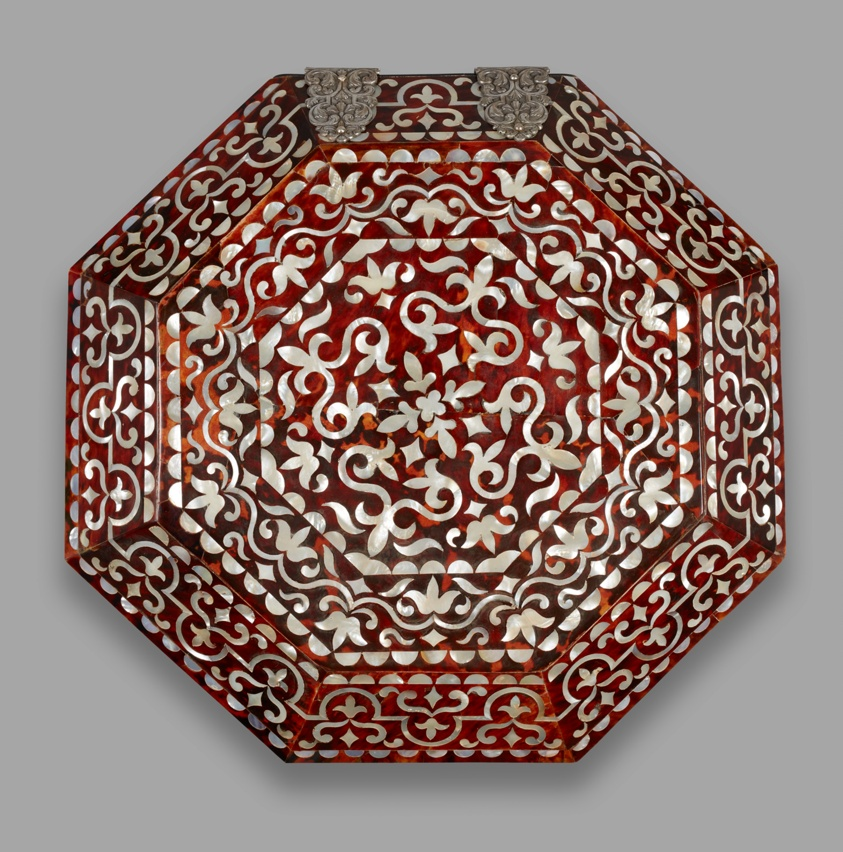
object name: Decorative Arts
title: Coffer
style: 18th Century, Baroque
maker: Peruvian; Probably Lima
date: c. 1750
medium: Wood, tortoiseshell, mother-of-pearl, silver, glass, and paint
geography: Lima department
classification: box; inlay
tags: box, coffer